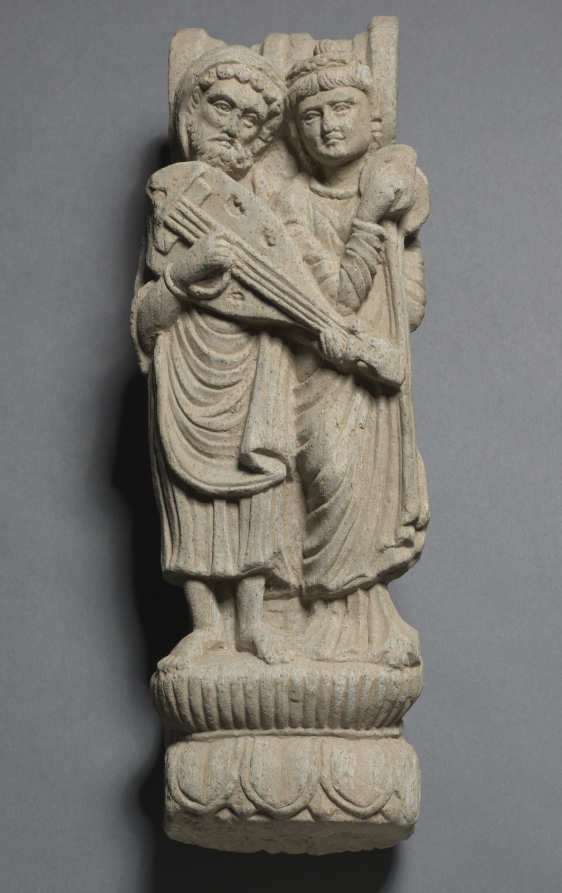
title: Bracket with Two Musicians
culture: Pakistan, Gandhara, probably Butkara in Swat, Kushan period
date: 100s CE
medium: schist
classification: Sculpture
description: This vaulted bracket, with acanthus leaves on the side, is decorated with a musician-couple who stand on a lotus pedestal. Both figures wear heavily draped robes that consist of two garments: an outer one—like the classical Greek himation—and the inner one, ankle length on the male and floor length on the female. The man's head is covered with a cap or a hood, while the young woman wears her hair pulled into a chignon and decorated with a garland. She also wears heavy earrings. The bracket or corbel of this type, originally probably placed fairly high, seems to be a particularly appropriate component for being decorated with celestial, heavenly musicians. The style is quite characteristic for the Swat area, particularly around Butkara, where Domenico Faccenna conducted extensive archaeological excavations. A number of comparable pieces, including voluted brackets, are decorated with acanthus leaves and figures of diverse types, some of which are celestial musicians who hold the same instruments. The facial types represented here are almost identical to some of the figures from Butkara.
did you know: The bearded man plays a lute-like instrument, while his companion holds a clapper-type percussion instrument similar to the kartal still used in parts of India today.